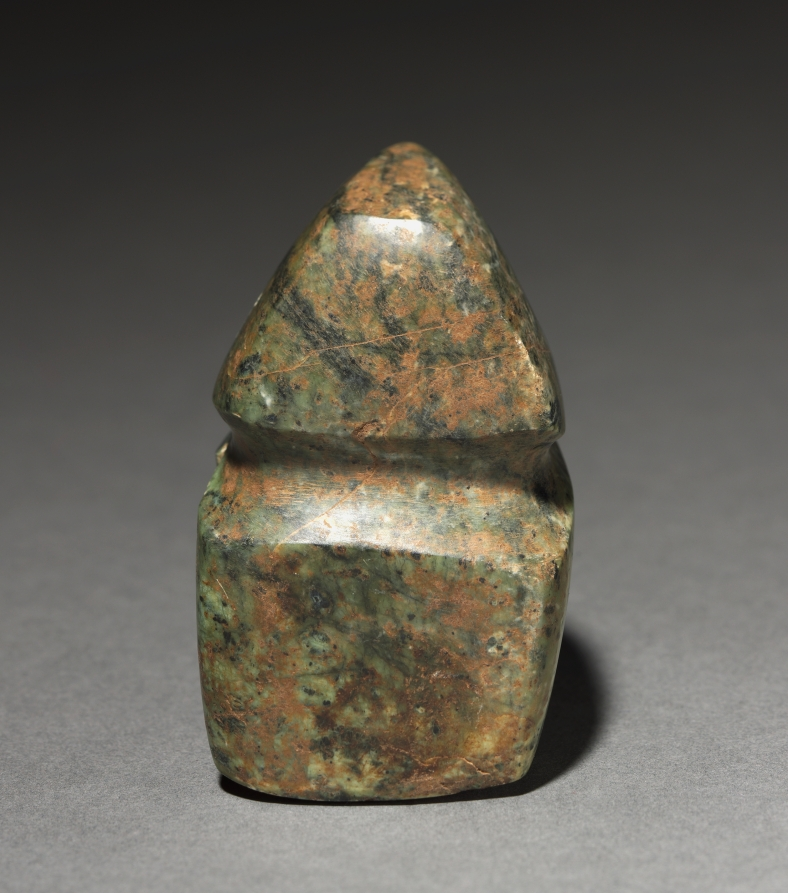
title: Seated Figure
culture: Mesoamerica, Mexico, Guerrero, Mezcala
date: 100 BCE–300 CE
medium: serpentine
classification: Sculpture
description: The Mezcala style takes its name from a river in its homeland, the Guerrero region of western Mexico. The style is known for small-scale sculptures characterized by sleek abstraction and often made of greenstone, one of the most precious materials that Mesoamerican artists worked. Unfortunately, little is known of the sculptures’ meanings and archaeological contexts.